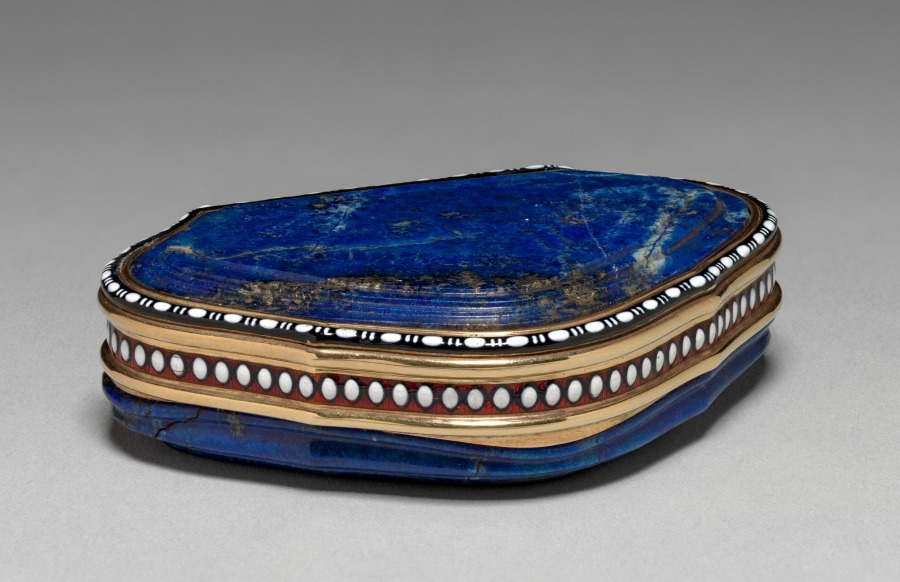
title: Snuff Box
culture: Germany, Dresden (?), mid-18th century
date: mid-1700s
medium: lapis lazuli with enameled gold mounts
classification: Miscellaneous